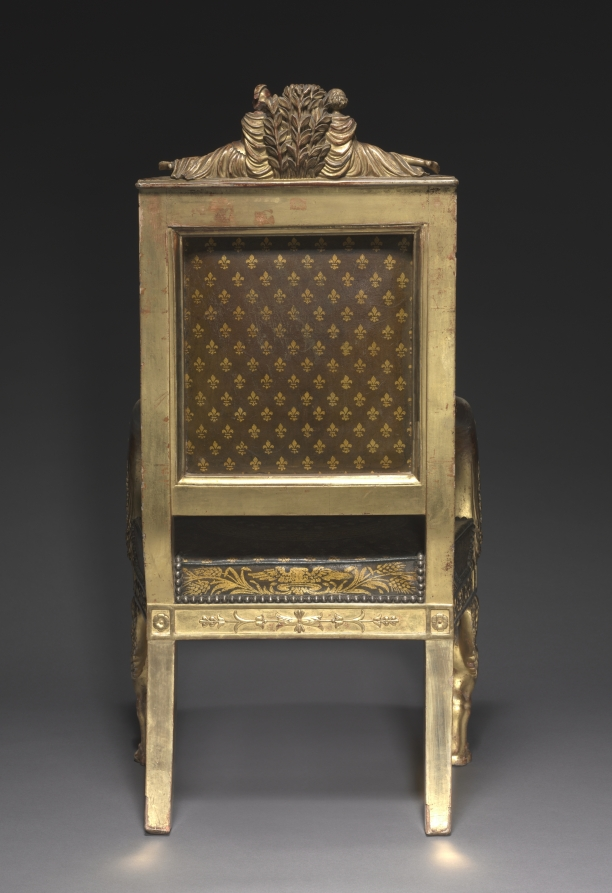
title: Child's Throne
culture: France, Paris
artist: Pierre-Marie Balny le Jeune (French, 1832)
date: 1822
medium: carved and gilded wood, leather upholstery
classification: Furniture and woodwork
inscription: inscribed with stencils inside back rail: BLONDEL TAPISSIER/RUE ST. ANTOINE N 72 1822 inscribed in ink lower edge back rail: 12 JANVIER 18[22?]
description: This chair was made for the young, presumed successor to the French throne who ruled briefly as Henri V in 1830, the last of the direct Bourbon line. He is depicted at the center of the top rail protected by female figures representing France and Minerva, the Roman goddess of wisdom. Fleurs-de-lis and the Gallic rooster, symbols of French royalty and the French people, decorate the upholstery.